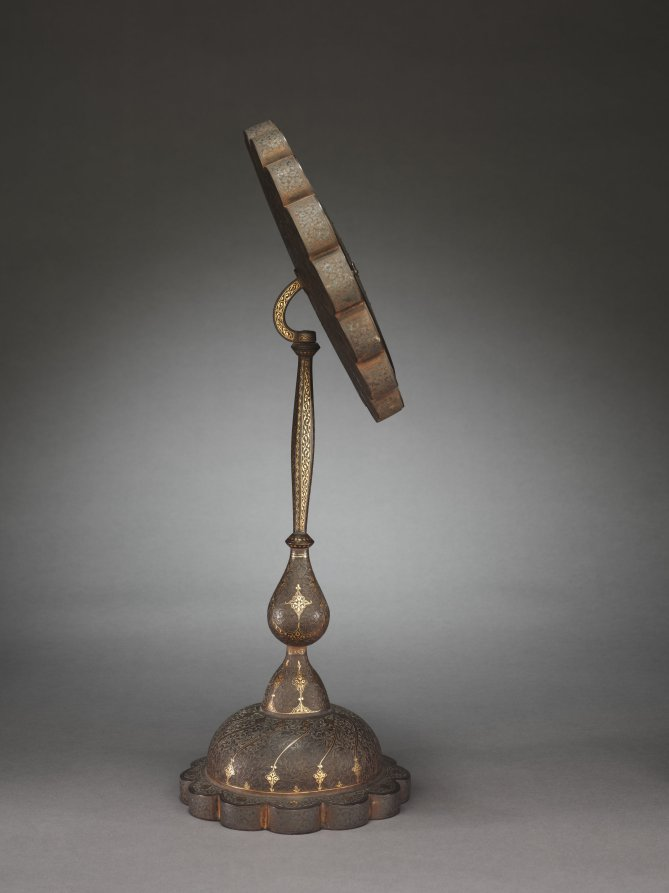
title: Mirror Stand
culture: Iran, Qajar period (1779-1925)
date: 1800s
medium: Steel engraved and inlaid with gold and silver with openwork calligraphic design on hinged door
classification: Metalwork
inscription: Selection from the inscriptions in the surrounding ring: نه هر که چهره برافروخت دلبری داند. نه هر که آینه سازد سکندری داند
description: The mirror was both a courtly accouterment and a popular poetic device in Persian literature. The central circular panel has a hinge and hook that opens to reveal the mirror. The texts in the ring are verses by different authors referring to mirrors. One says: Have they placed a mirror facing the sun at the door of that tent, Or is it the light rays shining from the forehead? Such mirrors were popular during the Qajar period (1779–1925), but this example evokes the grandeur of the earlier Safavid period by inscribing in the center the name of Shah Sulayman (1648–1694) who, fittingly, spent most of his 28-year reign with women in the harem, where such mirrors would have been used.